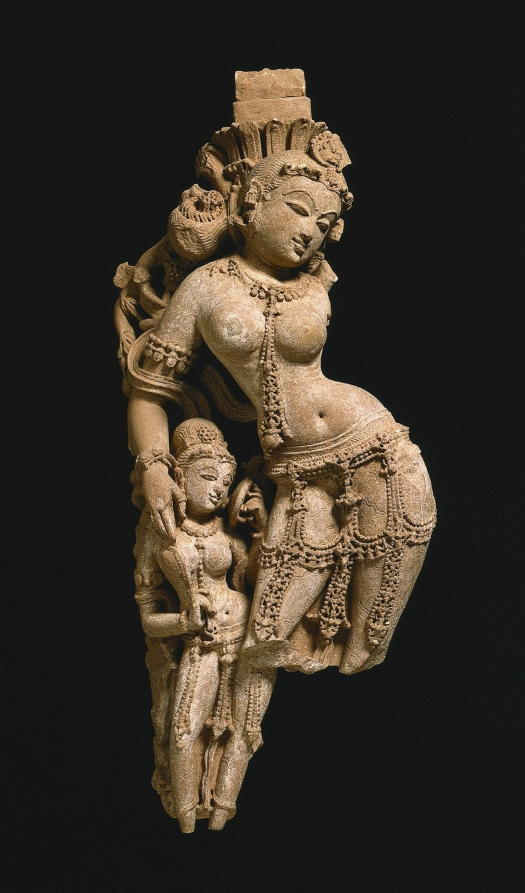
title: Female Tree Deity with Attendant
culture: Northwestern India, Rajasthan, Sikar, Harshagiri, 10th century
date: c. 973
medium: sandstone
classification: Sculpture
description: Memories of the nature divinities so important on the exterior of ancient Buddhist sites persist in female figures such as this on Hindu temples of the medieval period. Her form personifies fecundity, and the mango tree with which she is integrated bursts into the fruits that dangle down the side of the sculpture. Her attendant gazes into a mirror. This sculpture exemplifies the stylistic characteristics of the 900s, with the exaggerated thrust of her hip, and dense, crisply rendered areas of jewelry offset by smooth planes of flesh. Facial features are articulated with linear clarity and sharp outlines. These idealized female figures convey the notion of auspicious abundance and prosperity in the created world, which are benefits of worship and support of the temple.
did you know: There is a small monkey perched by the tree deity's shoulder.